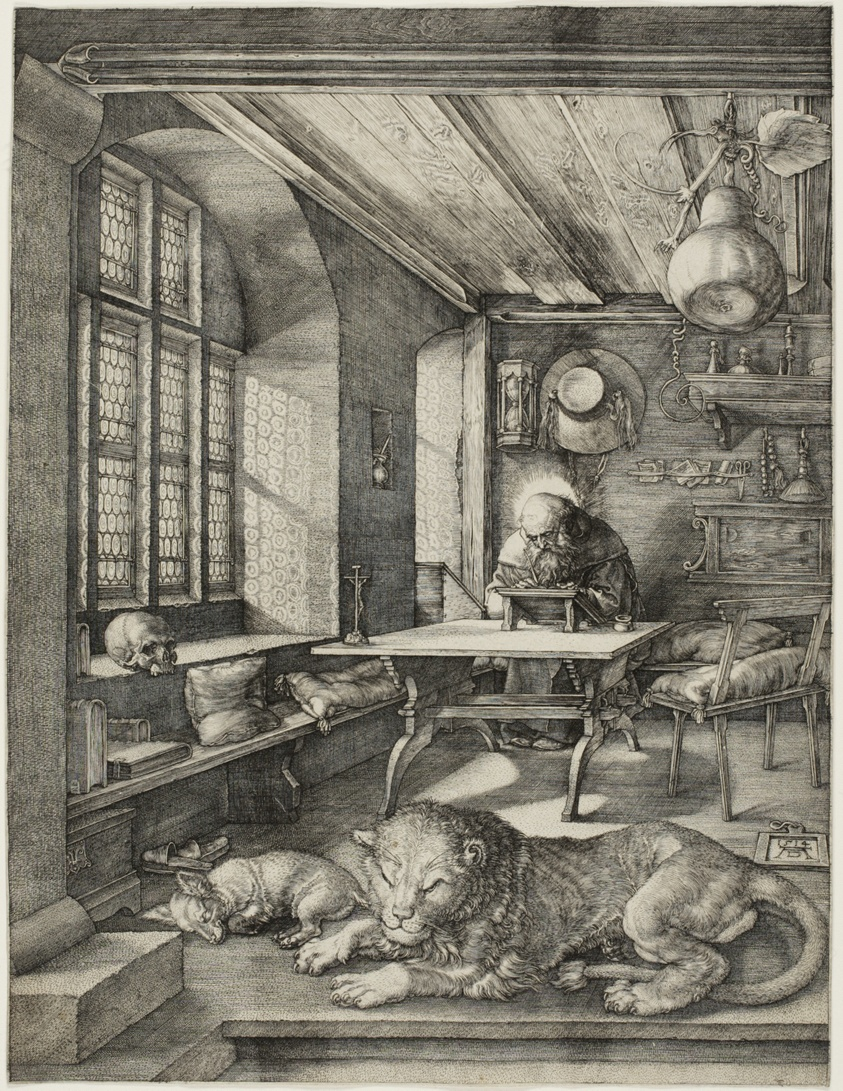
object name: Print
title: St. Jerome in His Study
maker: Albrecht Dürer (German, 1471-1528)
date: 1514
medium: Engraving in black on ivory laid paper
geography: Germany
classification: engraving; print; prints and drawing; paper